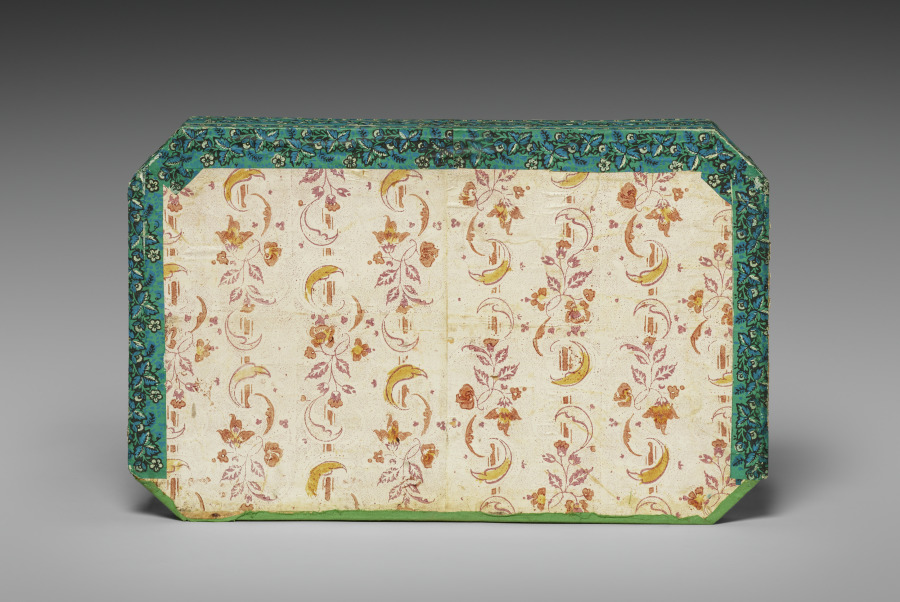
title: Chest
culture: Italy, Venice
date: 1700s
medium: leather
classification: Miscellaneous